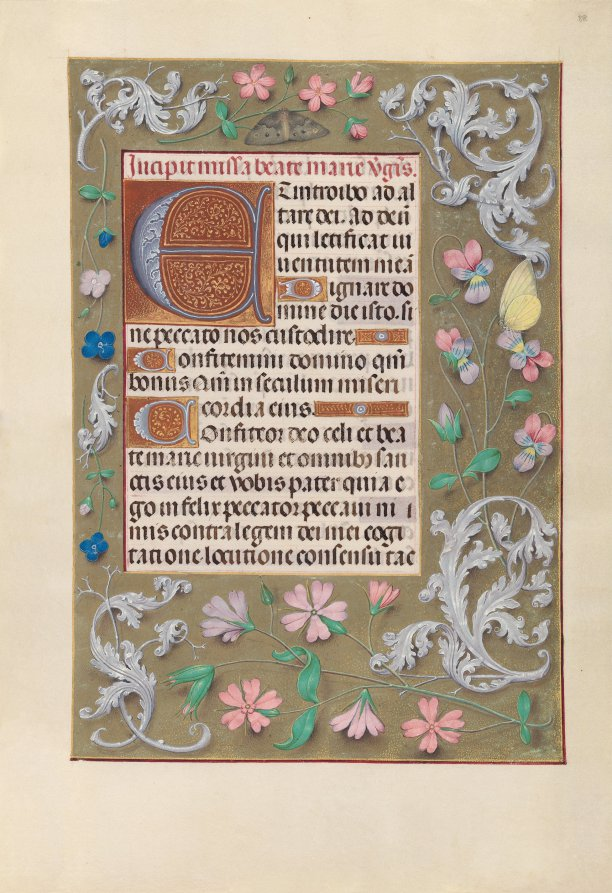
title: Hours of Queen Isabella the Catholic, Queen of Spain: Fol. 88r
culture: Flanders, Ghent and Bruges, late 15th century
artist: Master of the First Prayerbook of Maximillian (Flemish, c. 1444–1519)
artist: and Associates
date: c. 1500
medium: ink, tempera, and gold on vellum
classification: Bound Volume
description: This manuscript was illuminated by a circle of at least five highly organized manuscript painters active in the Flemish cities of Ghent and Bruges. The principal illuminator was Alexander Bening, who painted the majority of the book's miniatures. Manuscripts produced by this circle of artists are renowned for the decoration of their borders, which typically feature a rich variety of realistically-painted flowers, birds, and butterflies. This prayer book, called a book of hours, was intended not for a cleric, but for the private devotions of a lay person-in this case, Isabella the Catholic, Queen of Spain (1451-1504). Isabella's coat of arms embellishes the book's frontispiece. It is unlikely that the book was commissioned by the Queen herself; rather, she probably received it as a diplomatic gift from someone courting her patronage, perhaps Cardinal Francisco Jimenez de Cisneros. A Franciscan friar, Jimenez was dependent upon Isabella for his advancement, first to the post of Queen's confessor in 1492, and then to Archbishop of Toledo in 1495.